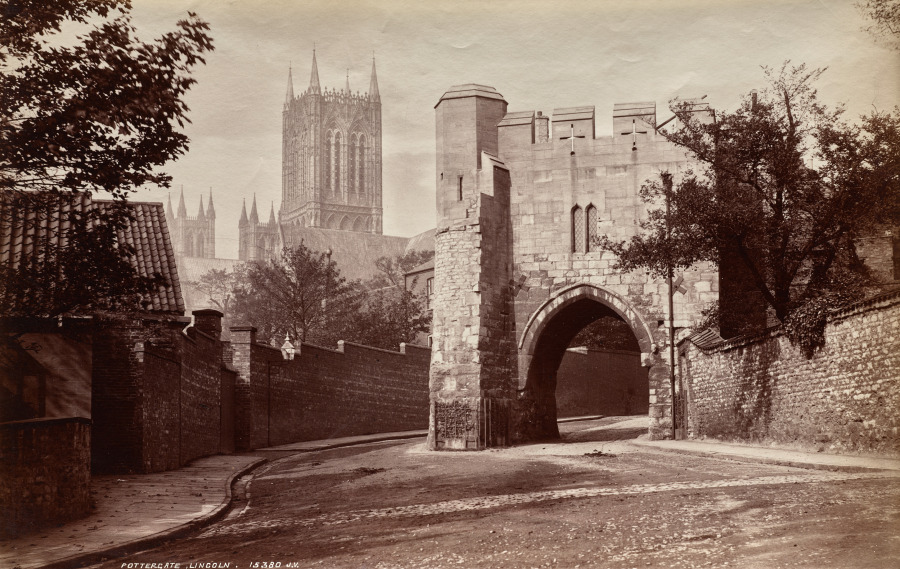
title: Pottergate, Lincoln, England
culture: England, 19th century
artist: James Valentine (British, 1815–1880)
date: c. 1870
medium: albumen print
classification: Photograph